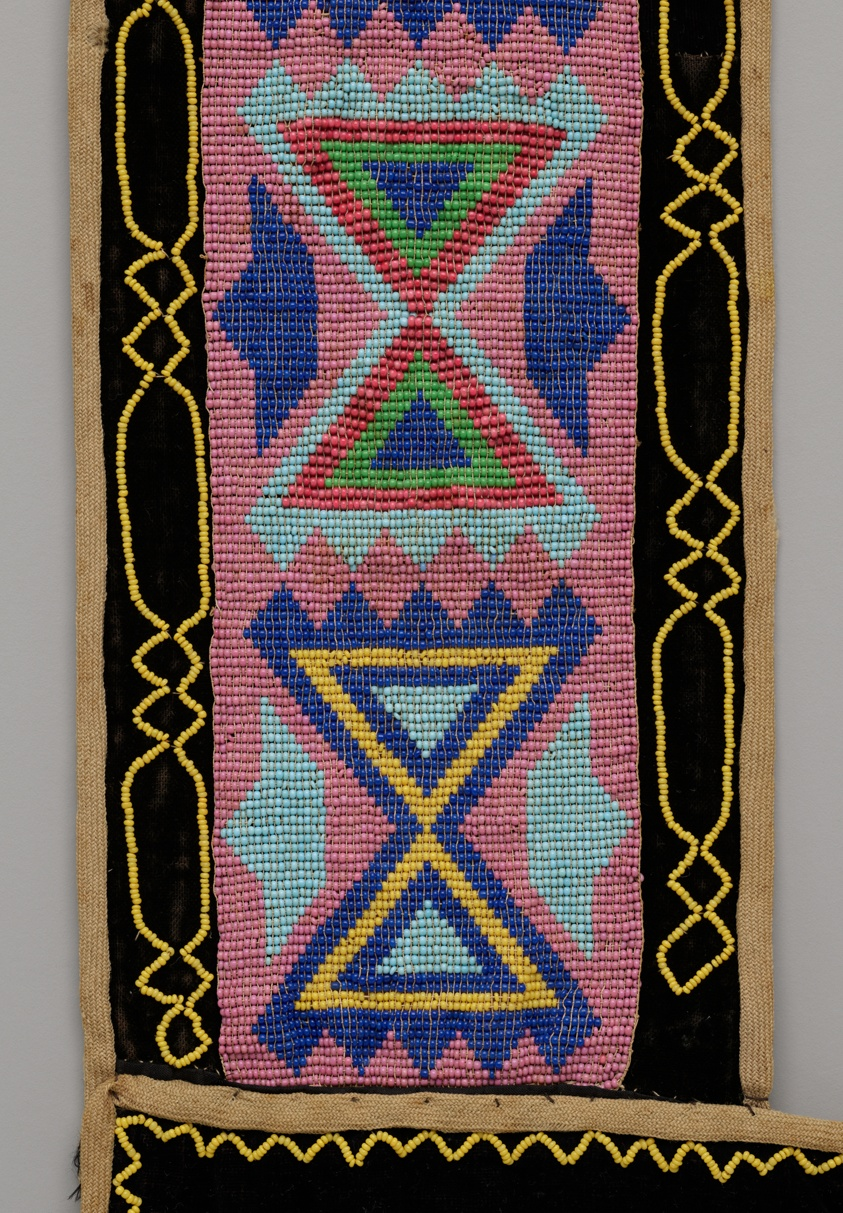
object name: Costume and Accessories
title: Man's Shoulder Bag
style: potawatomi, native american, americas, Arts of the Americas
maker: Maker unknown (Potawatomi); Great Lakes region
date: Mid–late 19th century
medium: Cotton, velvet, yarn, and glass seed beads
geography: Great Lakes Region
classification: beadwork; costume accessory; costume; art of the americas